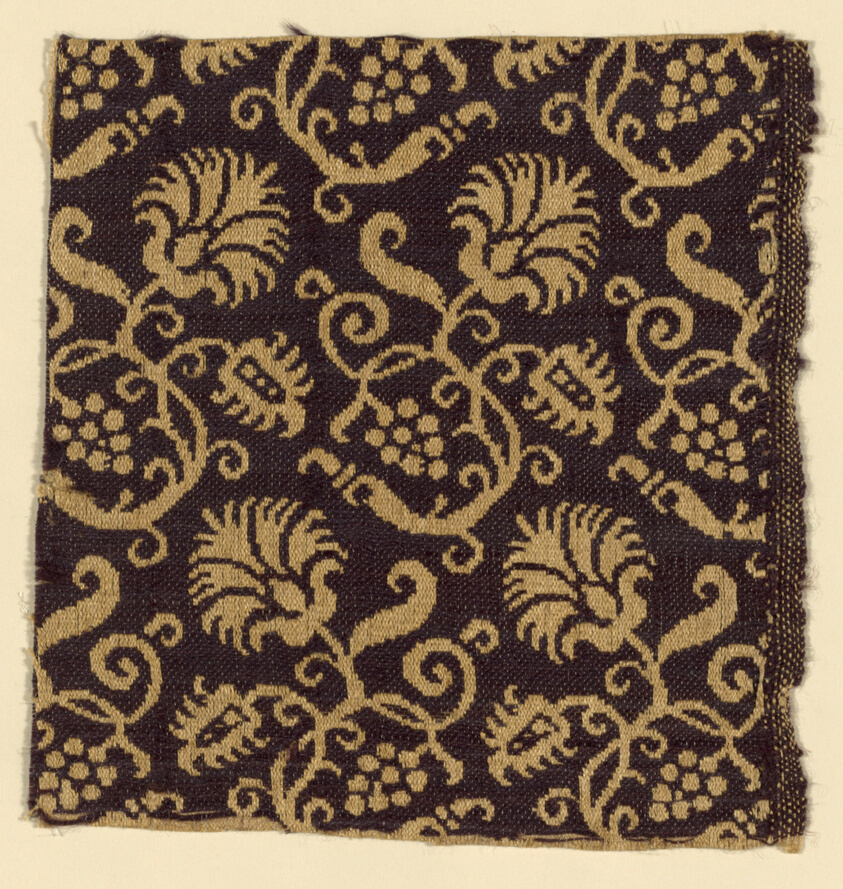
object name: Textile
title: Fragment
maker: Netherlands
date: 1601/25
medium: Linen and wool, plain weave; tied and free double cloth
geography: Europe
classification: textile; weaving